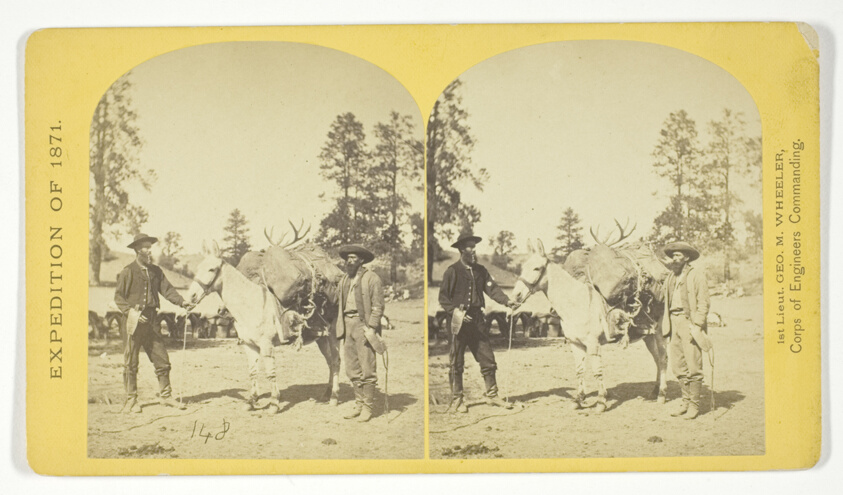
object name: Photograph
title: Mountain transportation. Pack mule, Pack and Packers, No. 7 from the series "Geographical Explorations and Surveys West of the 100th Meridian"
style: 19th century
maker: Timothy O'Sullivan (American, born Ireland, 1840–1882); commissioned by George Wheeler for the War Department, Corps of Engineers, U.S. Army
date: 1871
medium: Albumen print, stereo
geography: United States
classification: stereograph (albumen); photography; photograph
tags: Collected by Hugh Edwards, Geographical Explorations and Surveys